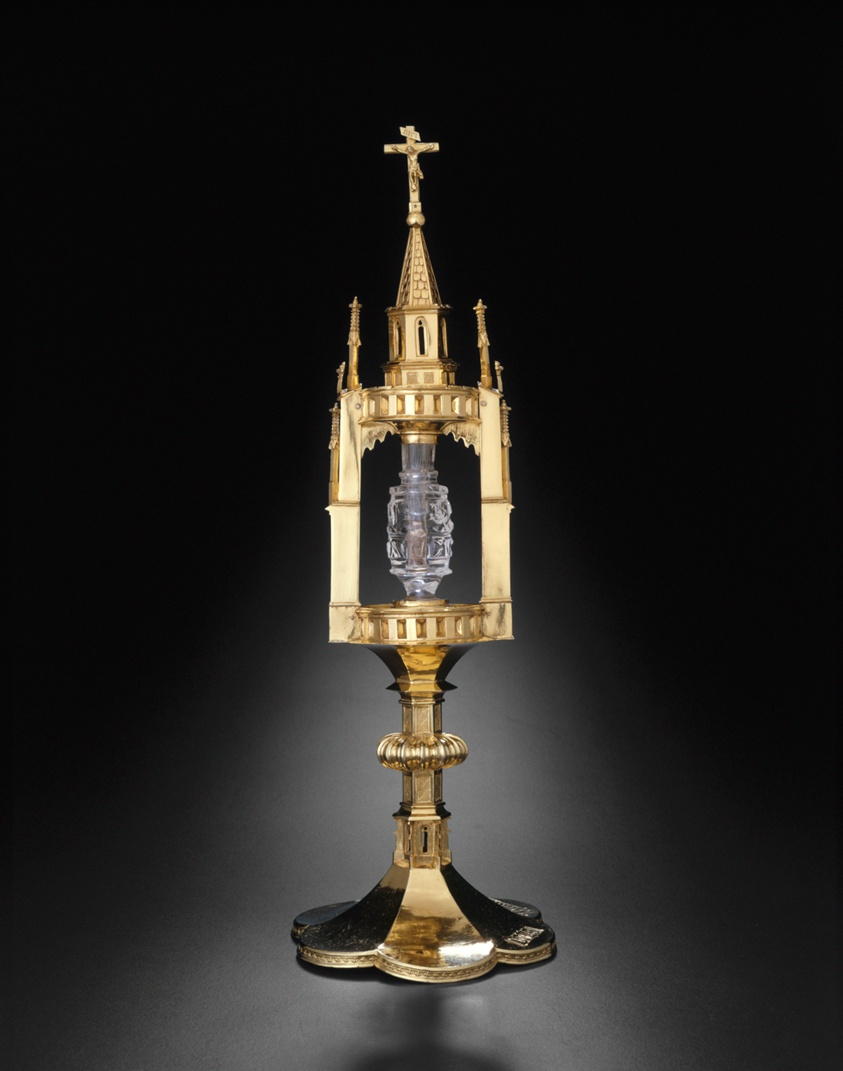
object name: Metalwork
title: Reliquary Monstrance with a Tooth of Saint John the Baptist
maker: Weddeghe Velstede (German, active 1432-73); container: Egyptian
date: 1433; container: 900/1200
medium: Silver gilt, rock crystal, textile, and human remains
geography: Germany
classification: ceremonial object; vessel; metalwork; european decorative arts; decorative arts; reliquary; religious